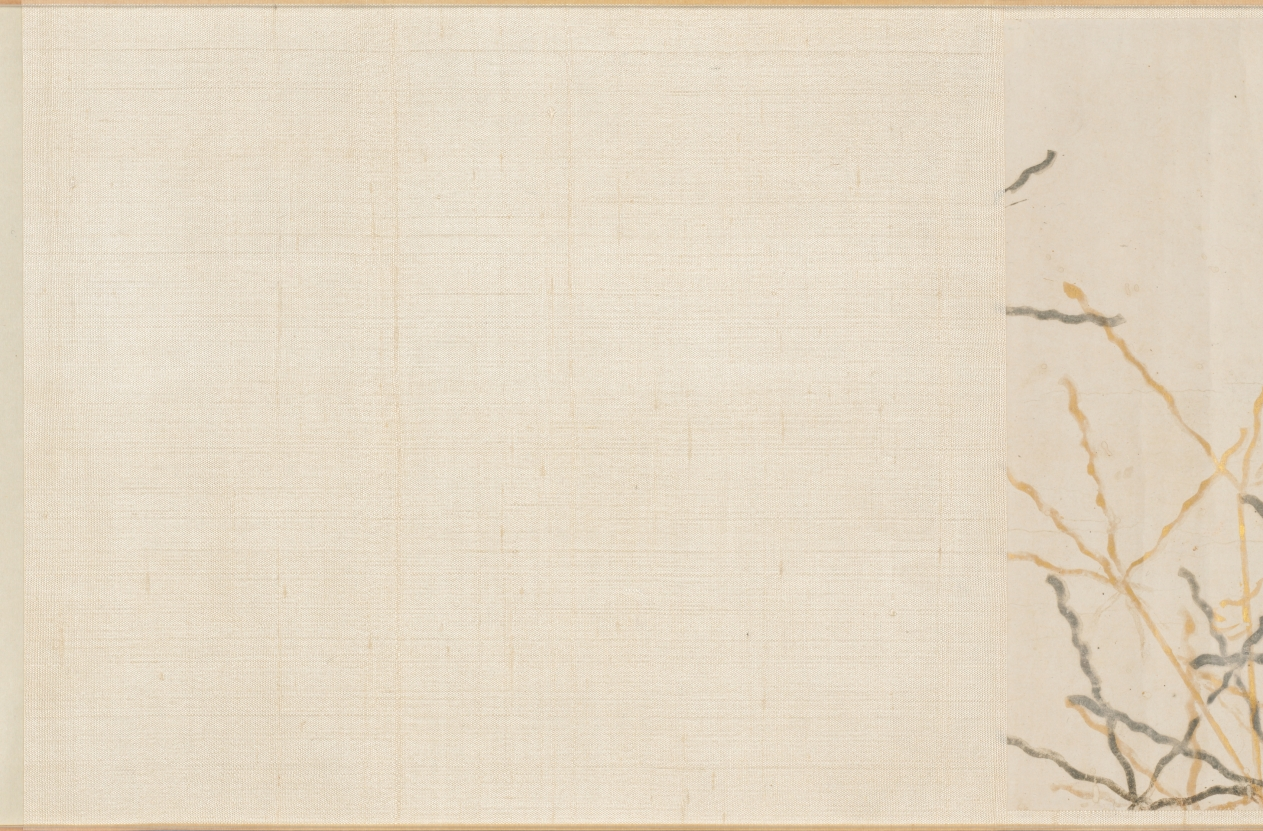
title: Selections from the New Collection of Japanese Poems from Ancient and Modern Times (Shinkokin wakashū) with Printed Designs of Chinese Lions and Crab Finger Grass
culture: Japan, Edo period (1615–1868)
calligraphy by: Hon'ami Kōetsu (Japanese, 1558–1637)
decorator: Tawaraya Sōtatsu (Japanese, c. 1570–c. 1640)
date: early 1600s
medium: handscroll; ink, gold, and silver on paper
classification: Calligraphy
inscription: Seal: 光悦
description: Hon’ami Kōetsu was a calligrapher and craftsman who frequently collaborated with the painter Tawaraya Sōtatsu, considered the first master of the Rinpa school. Kōetsu brushed seven poems from the autumn section of a poetry anthology onto dyed paper with motifs designed and printed in gold and silver by Sōtatsu.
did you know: Before becoming a master painter of screens, Tawaraya Sōtatsu painted fans.